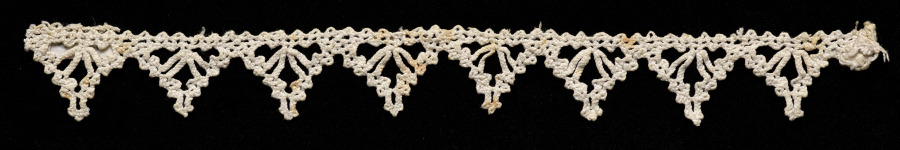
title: Lace Edging with Points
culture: Italy, Venice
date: 1540–60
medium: Bobbin lace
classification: Lace